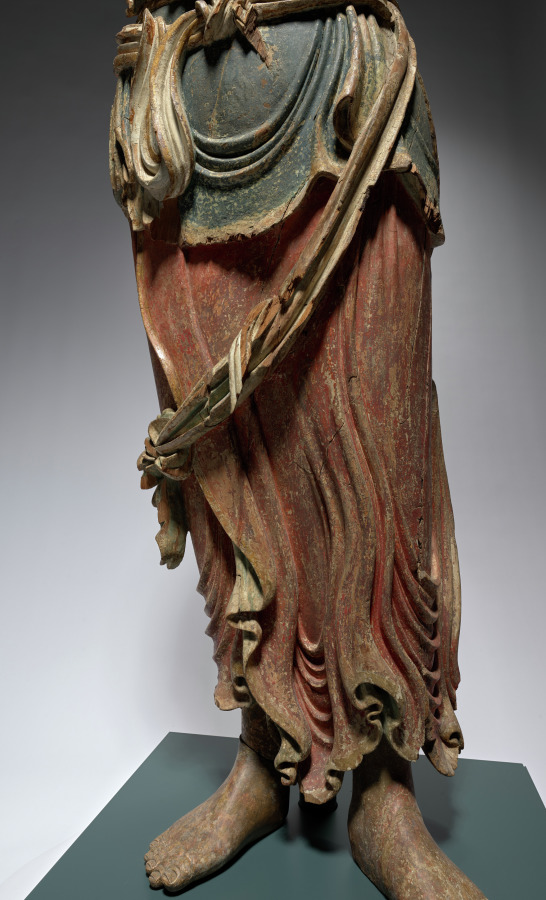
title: Eleven-Headed Guanyin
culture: China, late Northern Song dynasty (960-1127) - Jin dynasty (1115-1234)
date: 1100–1200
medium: wood with polychromy and cut gold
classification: Sculpture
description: The bodhisattva is an enlightened being dedicated to the spiritual awakening of all beings. The compassionate bodhisattva Guanyin, in a variety of manifestations, is probably the most popular deity of worship in Chinese Buddhism. In the Esoteric Buddhist form shown here, this standing Guanyin has a total of eleven heads, with smaller ones above the principal head. The uppermost head represents the Buddha Amitabha, to whom he is closely related. The eleven heads symbolize the Buddha’s steps on the path to enlightenment.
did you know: This Guanyin is carved from a single block of willow (genus Salix sp.).